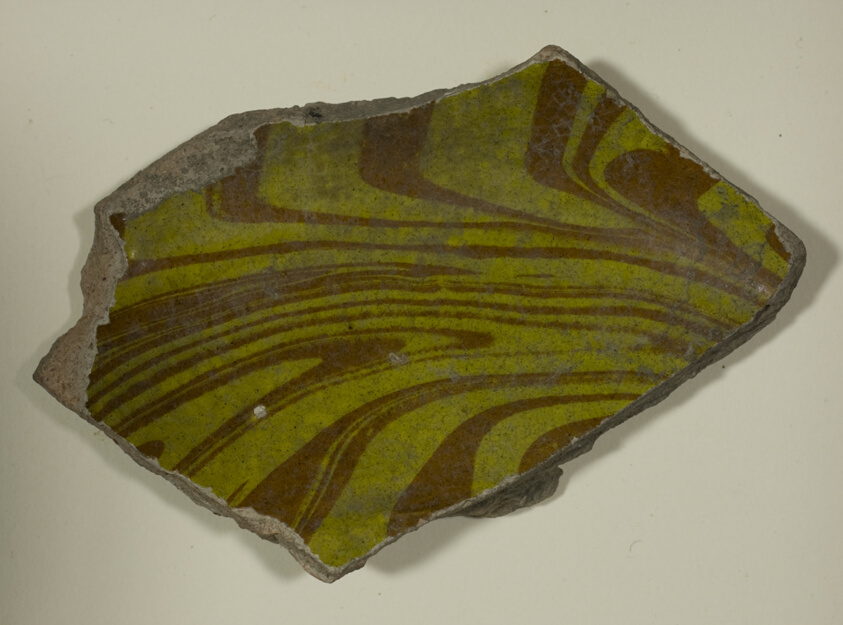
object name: Decorative Arts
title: Fragment of a Bowl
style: byzantine, european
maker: Post-Byzantine or Islamic (Ottoman); Northern Italy or Eastern Mediterranean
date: 16th-17th century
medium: Ceramic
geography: Byzantine Empire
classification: fragment; ceramics; vessel; bowl; asian art; decorative arts